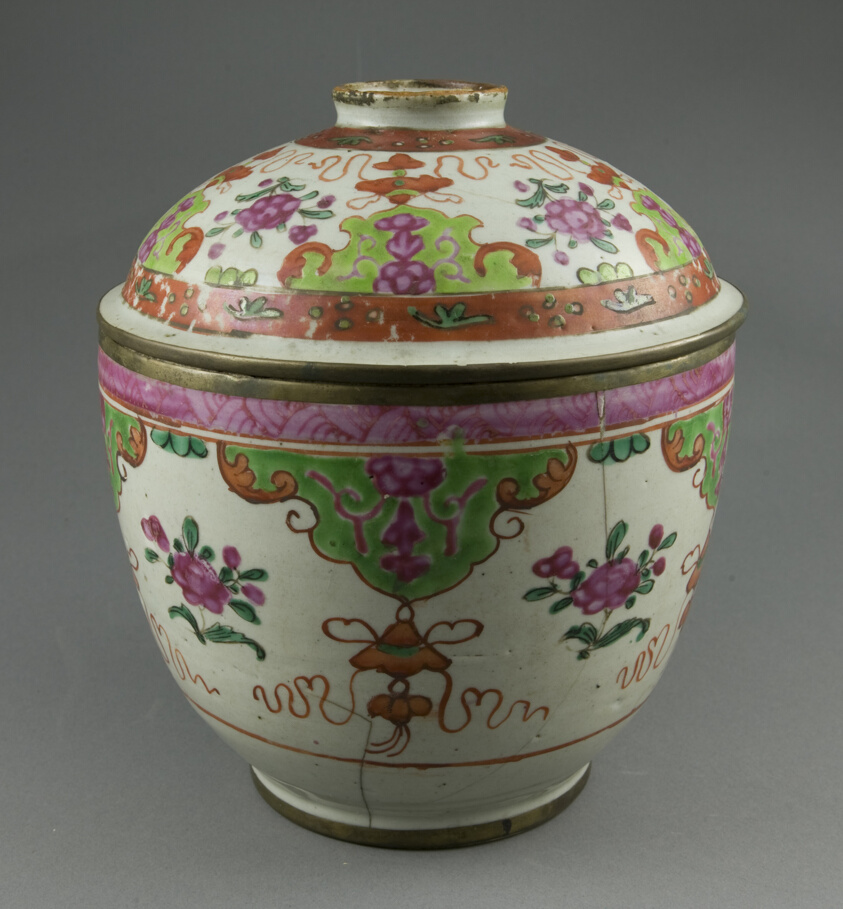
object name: Decorative Arts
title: Bencharong (Five-Colored) Ware, Covered Jar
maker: China, for the Thai Market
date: 19th century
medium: Porcelain painted in overglaze polychrome enamels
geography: China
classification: porcelain; asian art; ceramics; decorative arts